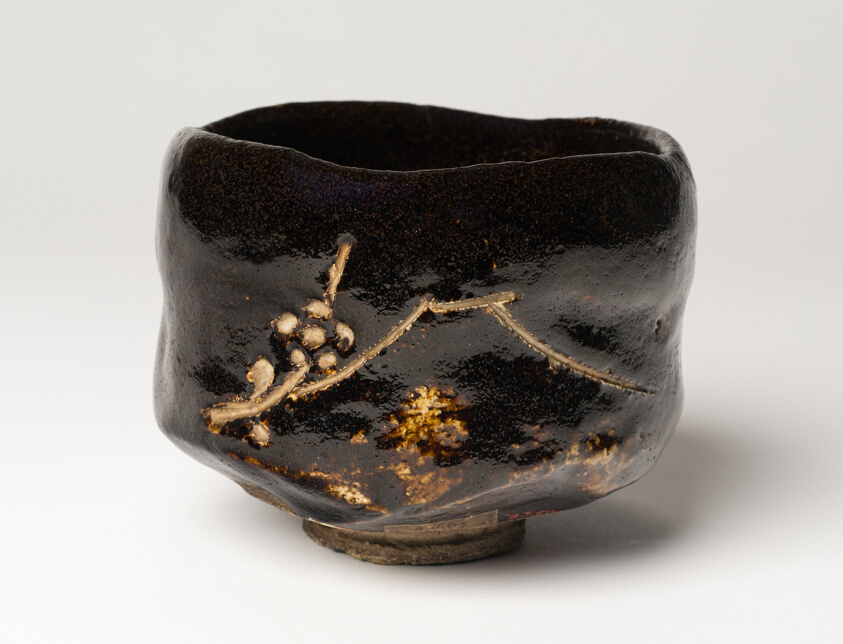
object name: Vessel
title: Raku Ware Teabowl with Image of Mount Fuji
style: Japanese (culture or style)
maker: Raku Ryōnyū (Japanese, 1756–1834)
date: Late 18th century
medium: Glazed stoneware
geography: Japan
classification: stoneware; asian art; ceramics; decorative arts